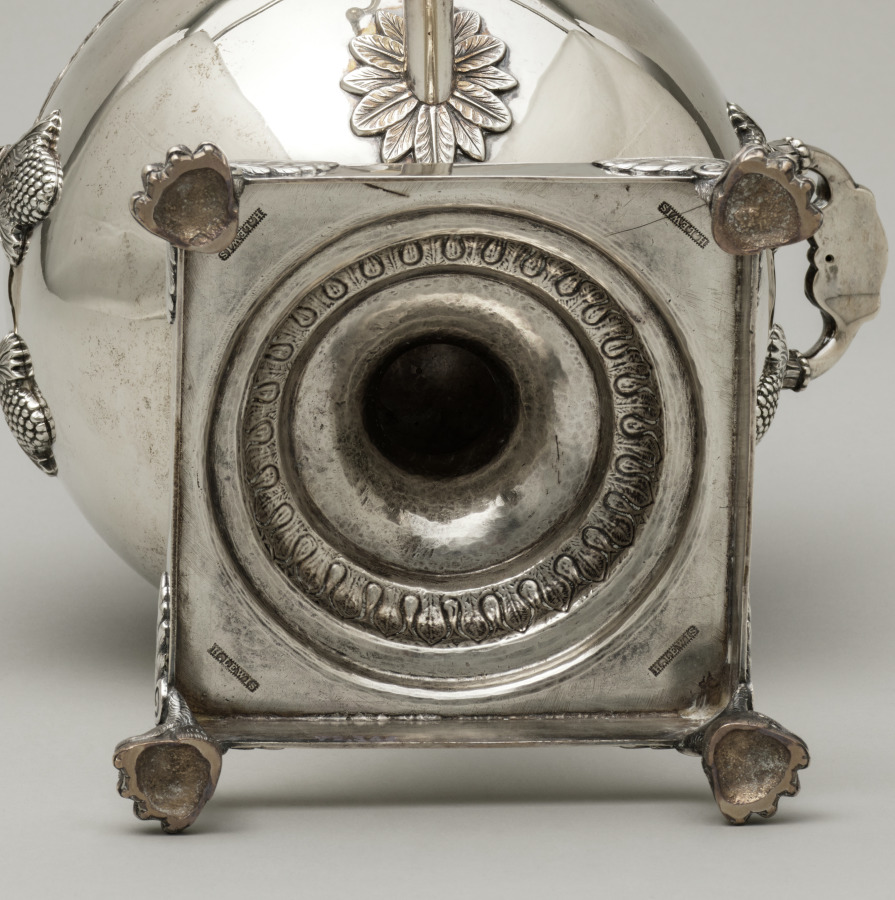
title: Tea Urn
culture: America, Pennsylvania, Philadelphia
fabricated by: Harvey Lewis (American, 1835)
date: 1811–25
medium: silver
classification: Silver